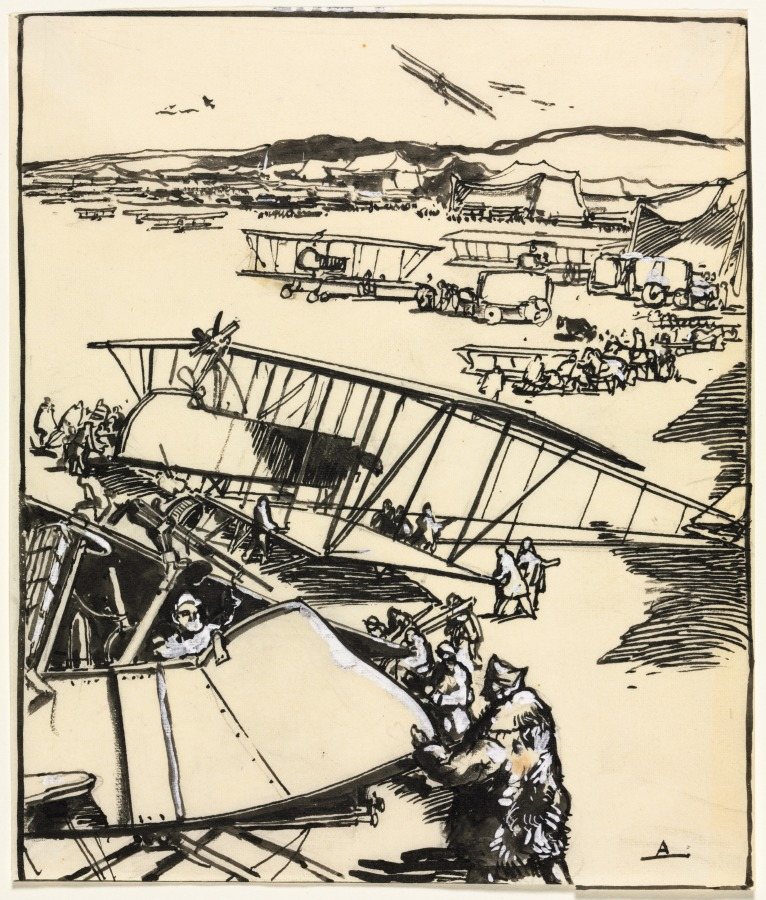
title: Avions reposant sur le terrain (recto and verso)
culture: France, 20th century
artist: Auguste Louis Lepère (French, 1849–1918)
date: 1914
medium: brush and brown ink and wash over pencil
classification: Drawing